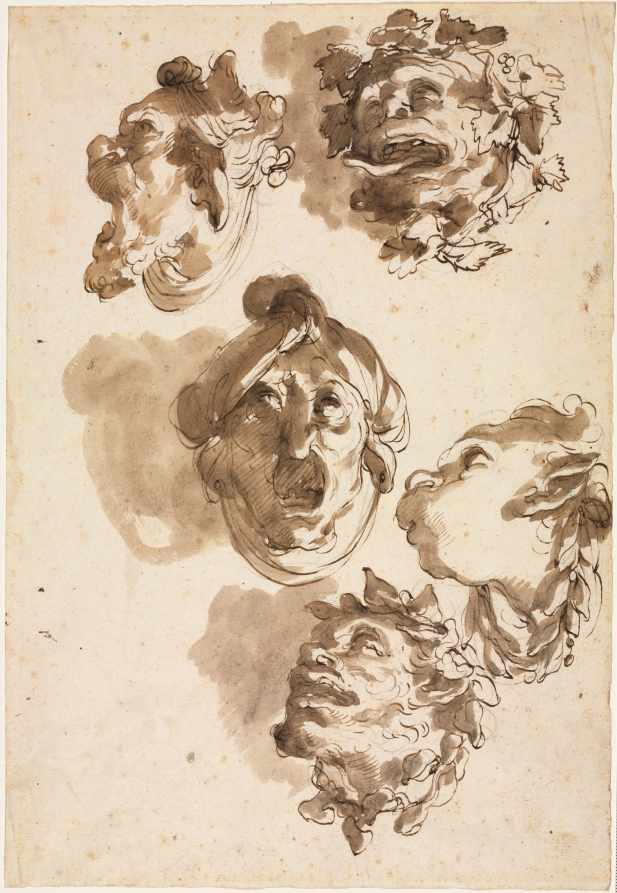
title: Five Grotesque Heads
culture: Italy, 18th century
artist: Gaetano Gandolfi (Italian, 1734–1802)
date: 1750–1800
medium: pen and brown ink and brush and brown wash over black chalk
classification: Drawing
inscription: verso, upper left, in graphite: [9?]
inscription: lower left, in graphite: 91127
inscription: lower right, in graphite(?): 6 -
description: From an early age, Gaetano Gandolfi was admired for his drawings, many of which were created as independent works of art and avidly collected by Italian and British patrons. This drawing is one of Gandolfi’s so-called teste pittoriche, or pictorial heads. Devised by the artist in the 1770s, this genre is based on contemporary academic theories that proposed that human emotions could be scientifically classified by facial expressions.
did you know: The term "grotesque" derives from the Italian word "grotteschi," which refers to the grottoes found in ancient Roman houses that were rediscovered around 1500.